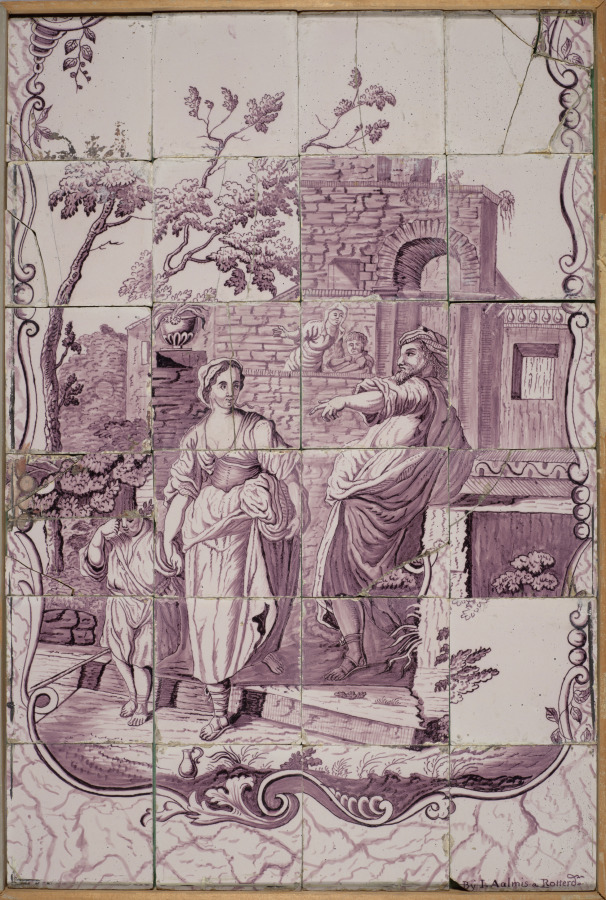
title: Tile Plaque: Abraham Expelling Hagar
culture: Netherlands, Rotterdam, 18th century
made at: De Bloempot Factory (Dutch)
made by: Jan Aelmis (Dutch, 1674–1755)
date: c. 1770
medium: ceramic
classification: Ceramic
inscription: inscribed lower right: "By I.Aelmis a Rotterd--."